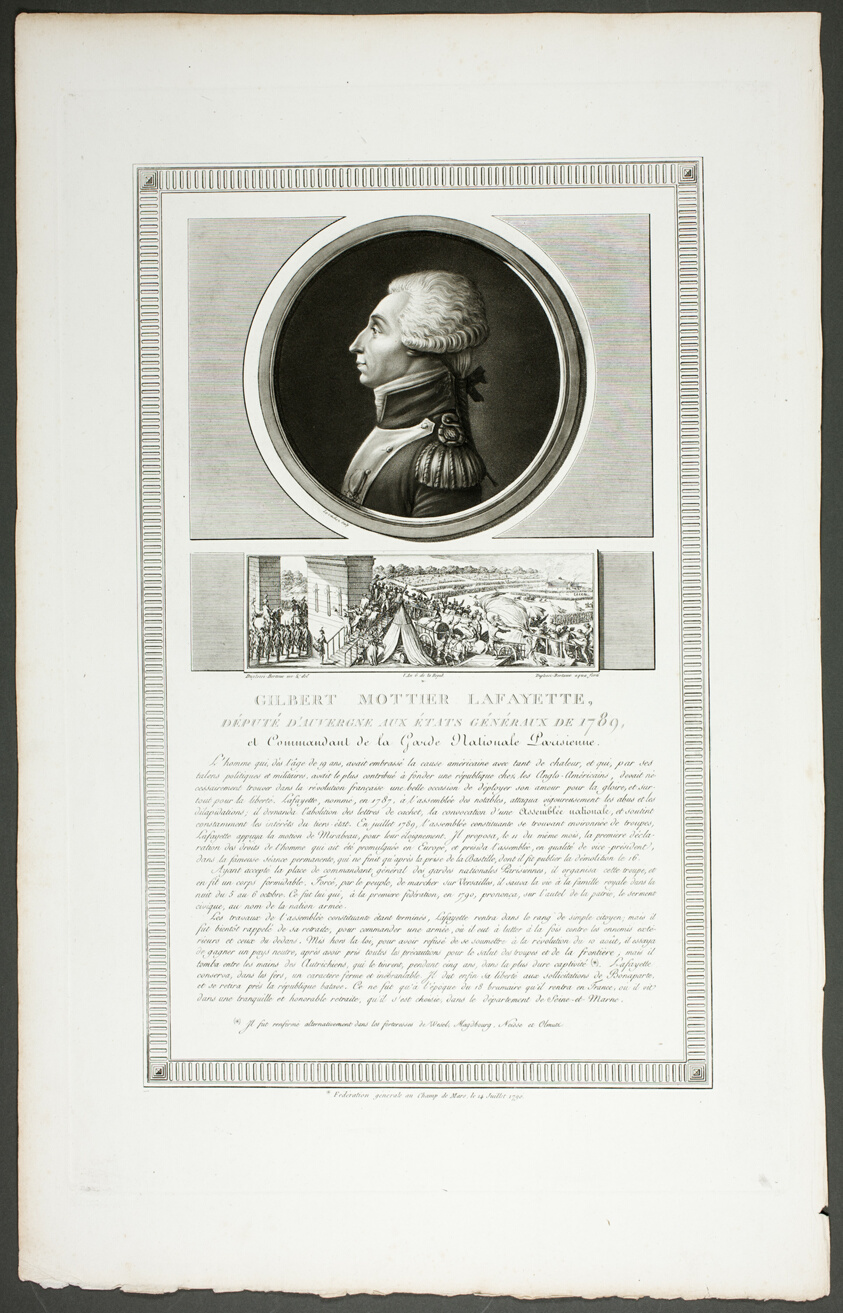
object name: Print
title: Gilbert Mottier Lafayette, Deputy State General of Auvergne, from Tableaux historiques de la Révolution Française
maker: Charles François Gabriel Levachez, and Son (French, 18th and 19th century); Jean Duplessi-Bertaux (French, 1747-1819)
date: 1798–1804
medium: Aquatint and etching, with engraving, in black on ivory wove paper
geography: France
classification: etching; print; prints and drawing